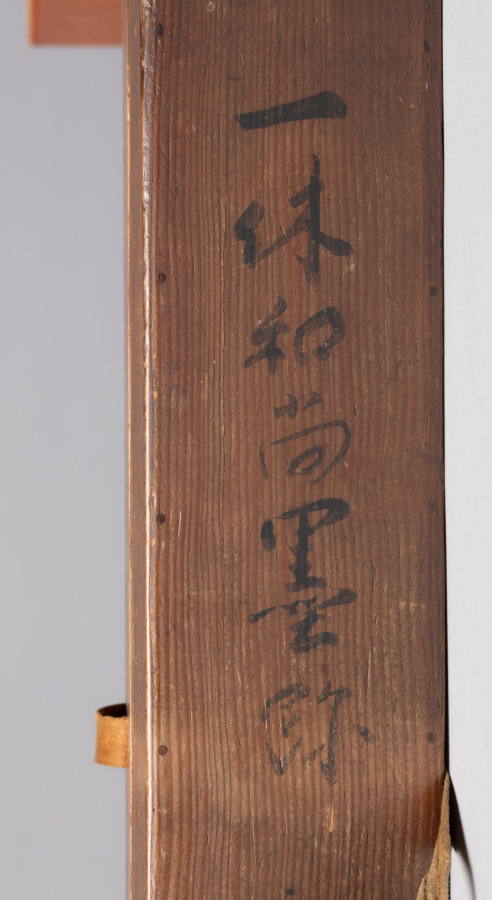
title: Calligraphy with Willow and Swallows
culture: Japan, Muromachi period (1392–1573)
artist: Ikkyū Sōjun (Japanese, 1394–1481)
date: 1400s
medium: hanging scroll, ink on paper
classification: Painting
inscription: How many days has it rid itself of the crow’s cloth? It knows not!/ Lovely is its body so nimble and neat./ Neither men of wealth, courtly position, or power can come close to the unfettered, noble swallow!/ With the coming of spring, it seems to be flying about, dancing around the grass hut of the foolish Priest. signed: Unkasō Isshi Tōkai jun Ikkyū shi ga ippitsu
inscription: outer box inscribed: Ikkyū Ōshō Enshi-zu Jigasan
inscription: inner box side lid inscribed: Showa 50 (1975), November by Tayama Honan with kao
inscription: Inner box side lid inscribed: Ikkyū Ōshō Bokuseki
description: The famed Buddhist monk Ikkyū is best remembered for his calligraphy. Calligraphic conventions of his time called for brushwork that did not vary much in style from character to character. However, as Ikkyū’s lines progress, his brushwork wanders between standard script and a sort of shorthand, marked by an uneven distribution of ink and a reduction of the characters to only the most necessary strokes. Ikkyū’s direct communication of emotion via brushwork became characteristic of the works produced by monks affiliated with the temple Daitokuji later in the Edo period (1615–1868).